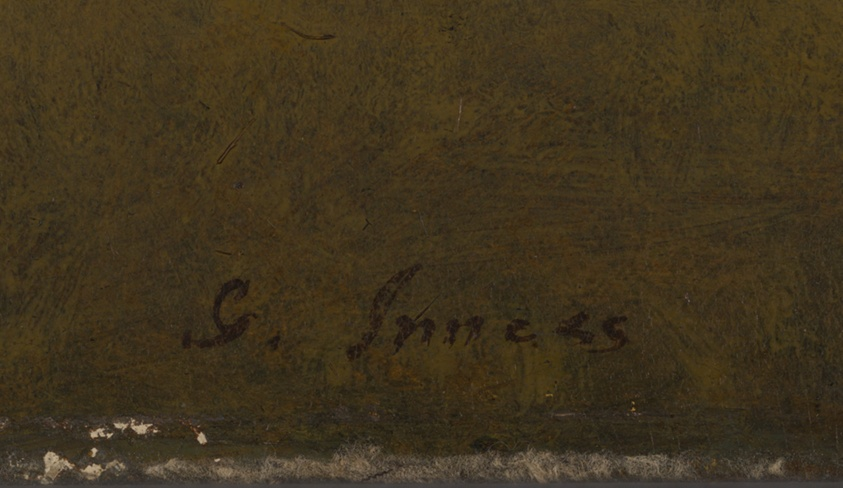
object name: Painting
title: Delaware Valley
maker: George Inness (American, 1825–1894)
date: c. 1865–75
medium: Oil on artist's board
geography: United States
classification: painting; american arts